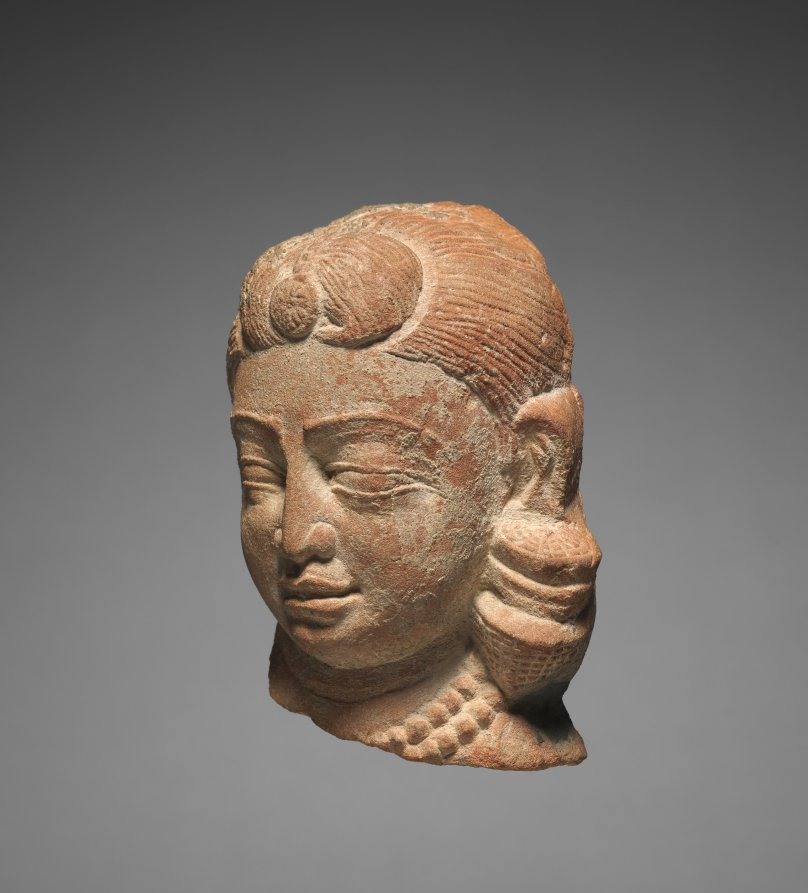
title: Miniature Female Head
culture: India, Mathura, Kushan period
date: 100s CE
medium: sandstone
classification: Sculpture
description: Against the backdrop of the large-scale monumental sculpture for which the Mathura school is justly noted, this miniature head may appear insignificant; however, it exemplifies on a diminutive scale qualities of style and execution that not only parallel developments noticeable on monumental sculpture but also reflect a certain freedom of treatment of facial details that clearly denotes that while the artist worked in a minor key, the creation was neither inconsequential nor a sequacious rendering of the major sculptural trends of large-scale sculptures from Mathura. This small female head is comparable to the yaksi in the CMA's 1965.250 in several readily apparent details of form and type. The dual strands of the large-beaded necklace, the oversized ear ornament, and the hairstyle with the lalatika in the circular, severely defined central section of the coiffure are reductive echoes of the larger sculpture that clearly suggest an analogous date for this head. While repeating some of the features of the yaksi, this small head retains an individuality and distinctness by means of fine details such as the indented secondary line defining the upper lip of the slightly parted mouth and the chiseled clarity of the nose and brows of this sloe-eyed image. The fullness of the facial planes and the sensuous curves of the full, lower lip, while accentuating by contrast the almost metallic quality of the eye and nose, also quite compellingly link this head with the larger yaksis.